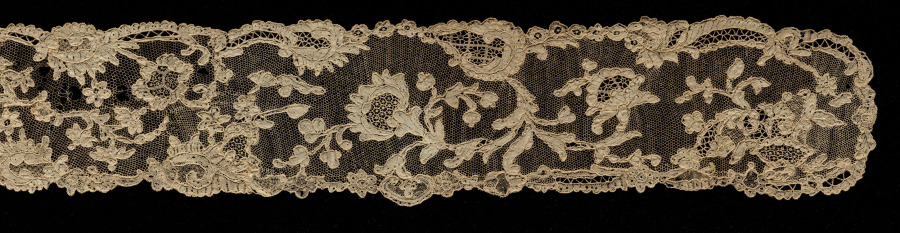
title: Lace Edging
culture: France, Alençon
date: 1715–74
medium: Linen: needle lace (Point d'Alençon)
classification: Lace